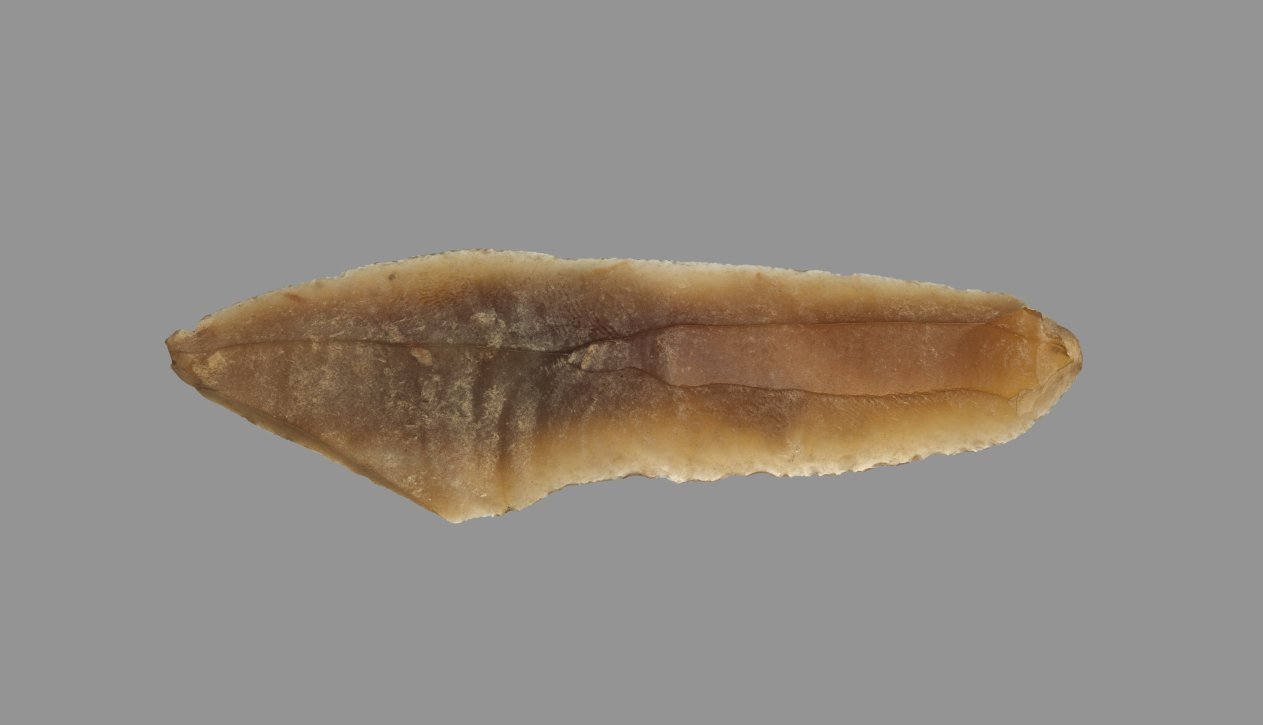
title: Sickle Blade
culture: Egypt, Middle Kingdom (2040–1648 BCE), Dynasty 12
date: 1980–1801 BCE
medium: flint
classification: Implements